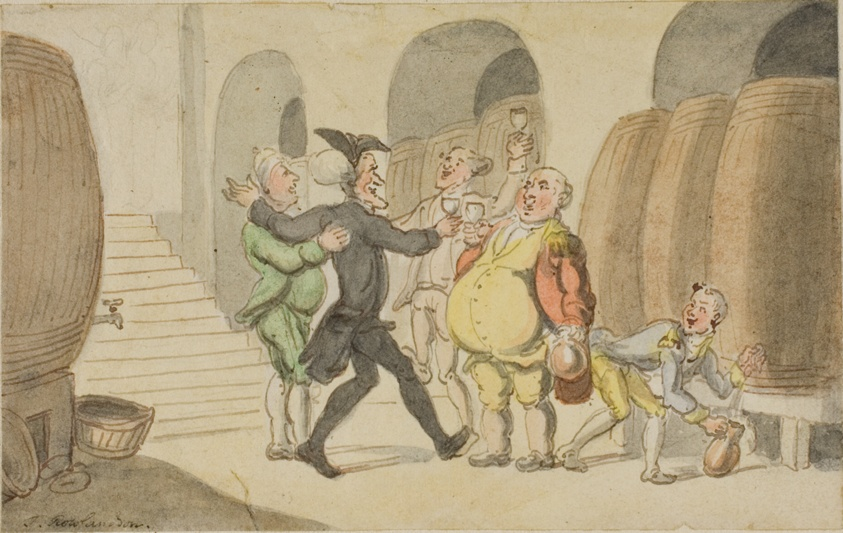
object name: Drawing and Watercolor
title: Study for Dr. Syntax made Free of the Cellar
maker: Thomas Rowlandson (English, 1756-1827)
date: c. 1812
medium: Pen and brown ink with brush and watercolor, over graphite, on ivory wove paper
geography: England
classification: watercolor; drawings (visual works); prints and drawing